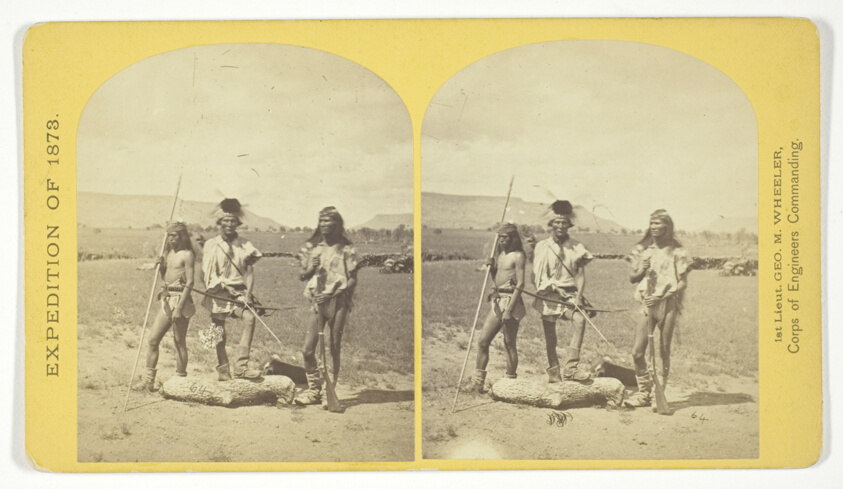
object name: Photograph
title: Apache Indians, as they appear ready for the war-path, No. 33 from the series "Geographical Explorations and Surveys West of the 100th Meridian"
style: 19th century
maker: Timothy O'Sullivan (American, born Ireland, 1840–1882); commissioned by George Wheeler for the War Department, Corps of Engineers, U.S. Army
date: 1873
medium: Albumen print, stereo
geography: United States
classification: stereograph (albumen); photography; photograph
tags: Collected by Hugh Edwards, Geographical Explorations and Surveys